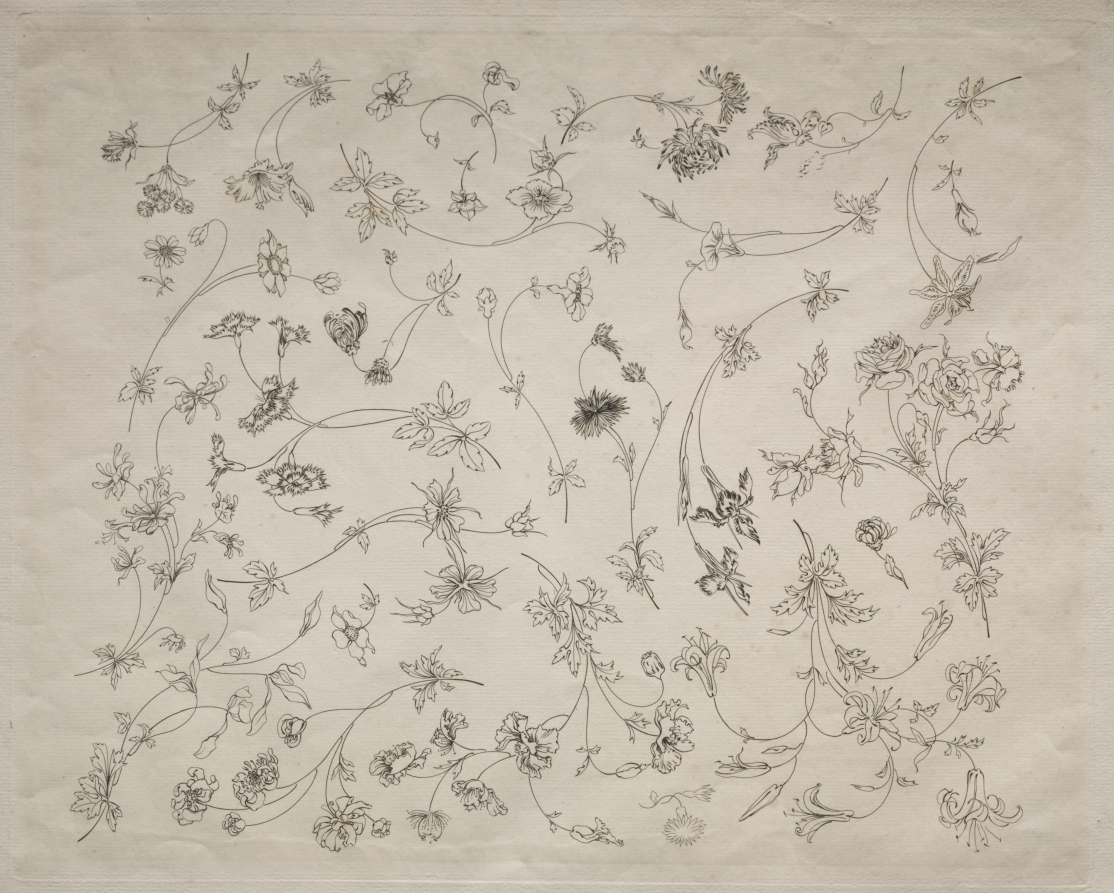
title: Flower designs for plates and borders (no. 14)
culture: France, 19th century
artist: Félix Bracquemond (French, 1833–1914)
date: 1872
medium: etching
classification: Print